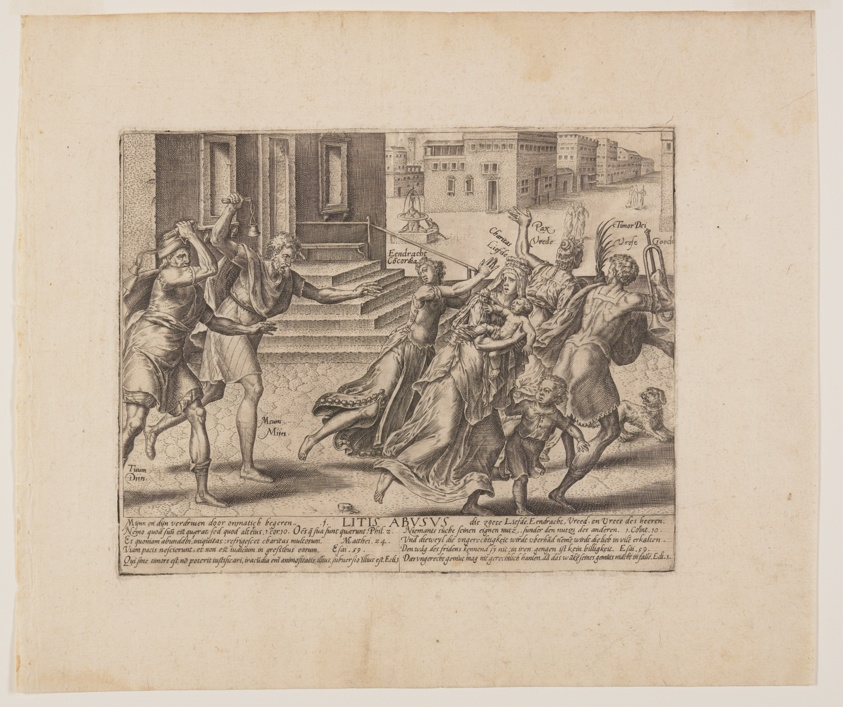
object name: Print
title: To Each His Own, from Litis Abusus (The Abuses of the Law)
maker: Hendrick Goltzius (Dutch, 1558–1617)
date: c. 1576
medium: Engraving on ivory laid paper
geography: Netherlands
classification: print; paper; prints and drawing; engraving